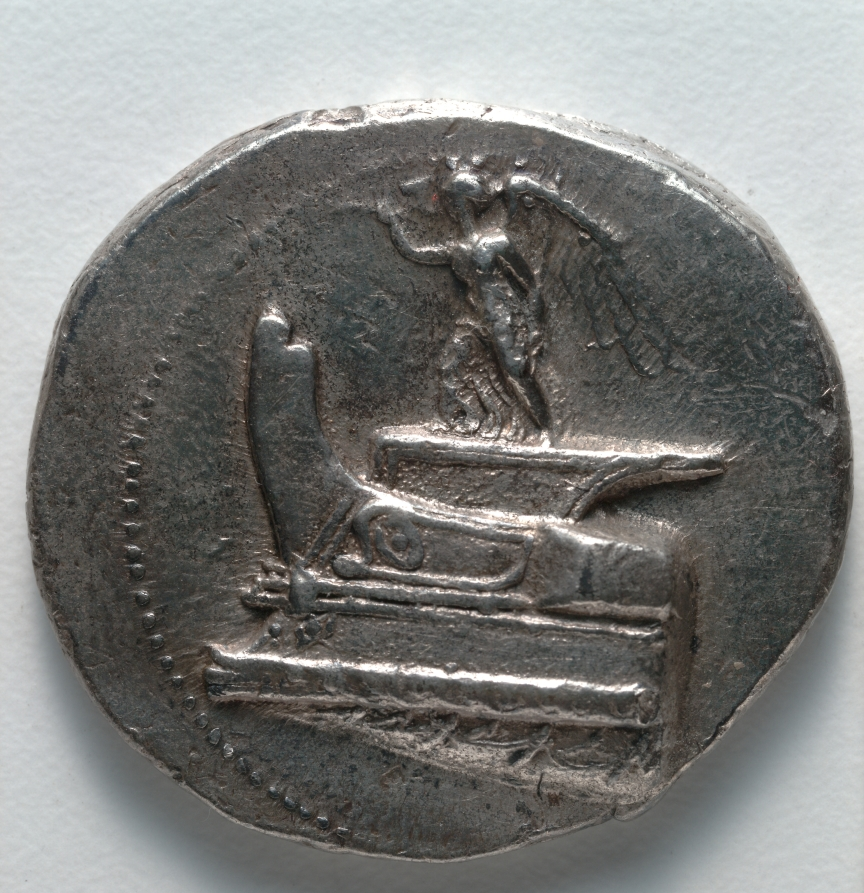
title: Tetradrachm: Nike on Ship's Prow, Blowing Trumpet (obverse)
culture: Greek, Macedonian, minted at Salamis (Cyprus), reign of Demetrios Poliorketes ("The Beseiger")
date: c. 300–295 BCE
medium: silver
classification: Coins